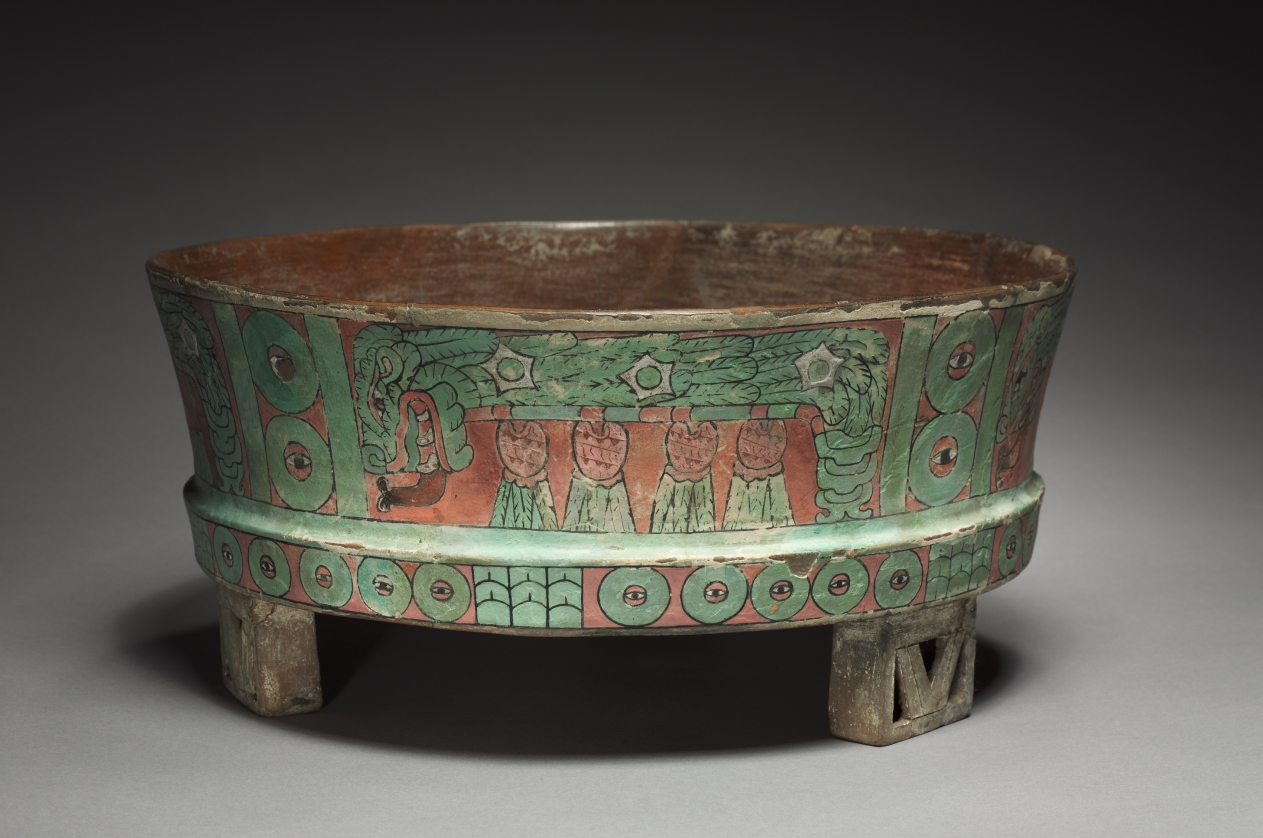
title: Basin with Feathered Serpent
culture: Central Mexico, Teotihuacán style, Classic period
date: 400–550 CE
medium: earthenware, stucco, pigment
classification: Ceramic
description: The serpent covered with the green feathers of the tropical quetzal bird is an image of verdant, bountiful nature and life. It also may be a symbol of rulership, thus linking rulers to cosmic forces and the natural order. Four human hearts lie beneath the serpent on this unusually large basin, suggesting that sacrifice stimulates nature’s fruitfulness.